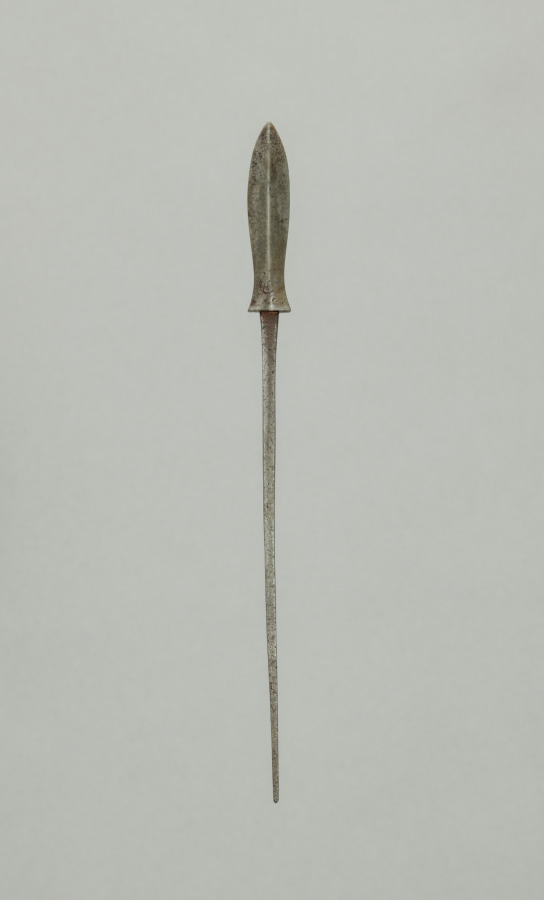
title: Arrow Point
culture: Japan, Edo period (1615–1868)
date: 1700s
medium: steel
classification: Arms and Armor